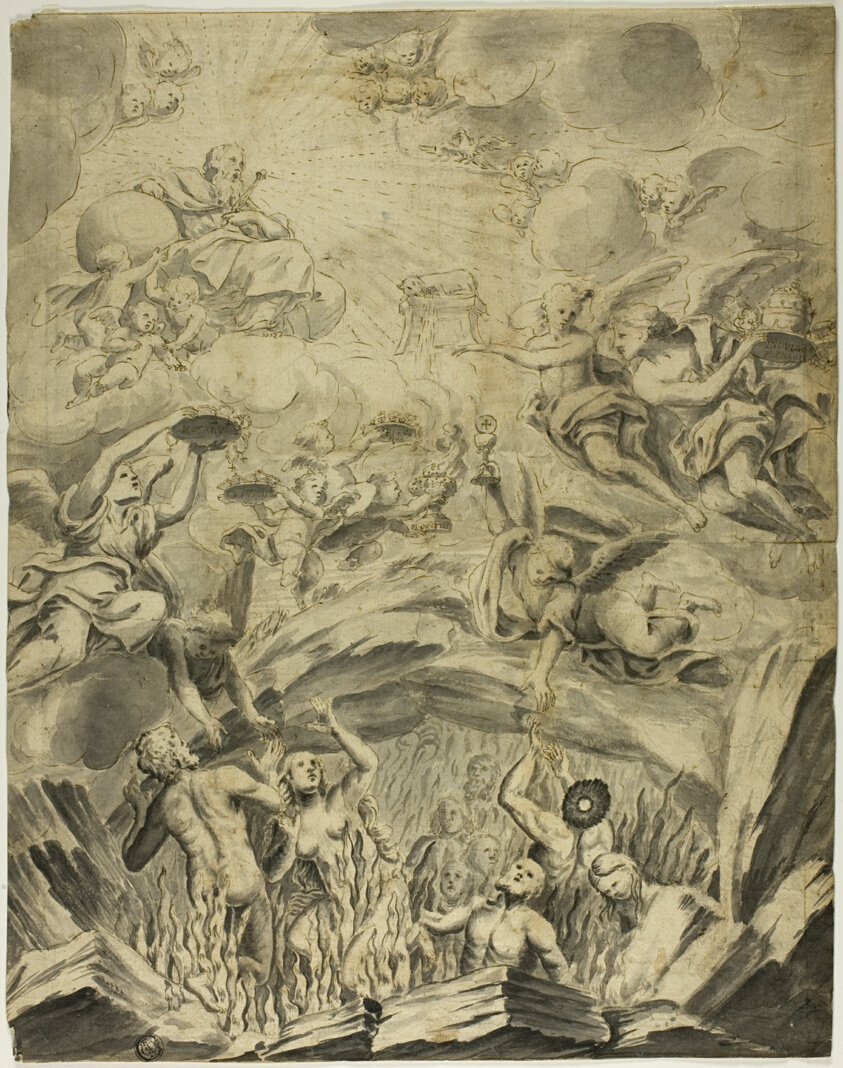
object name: Drawing and Watercolor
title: The Resurrection of the Dead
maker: Abraham Jansz. van Diepenbeeck (Flemish, 1596-1675)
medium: Pen and brown ink, with brush and gray wash, over traces of graphite, on ivory laid paper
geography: Flanders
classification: ink or chalk wash; drawings (visual works); prints and drawing